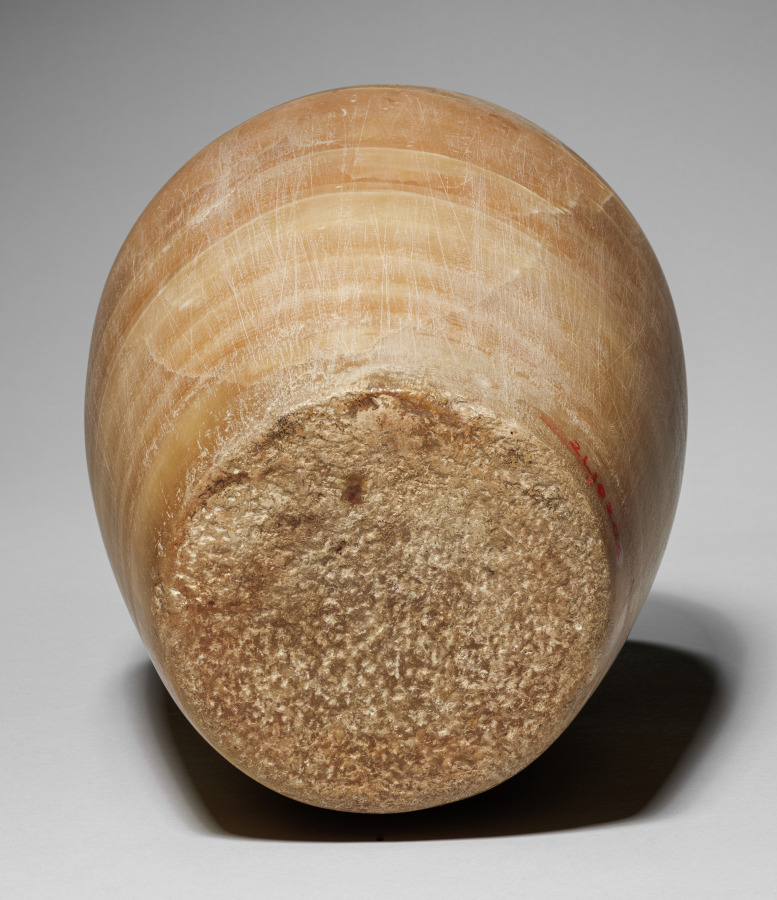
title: Canopic Jar with Baboon's Head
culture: Egypt, Late period (715–332 BCE), Dynasty 26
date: 664–525 BCE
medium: travertine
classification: Funerary Equipment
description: In the process of mummification, the liver, lungs, stomach, and intestines were removed, separately embalmed, and stored in specialized jars known as canopic jars (after a sailor in Greek mythology, who died at the town of Canopus in the Nile Delta and was worshipped there in the form of a human-headed jar). Each organ was identified with one of four funerary deities collectively known as the Sons of Horus: the liver with Imsety (man's head), the lungs with Hapy (baboon's head), the stomach with Duamutef (jackal's head), and the intestines with Qebehsenuef (falcon's head). It was their duty to protect the deceased and restore to him his body parts in the hereafter.